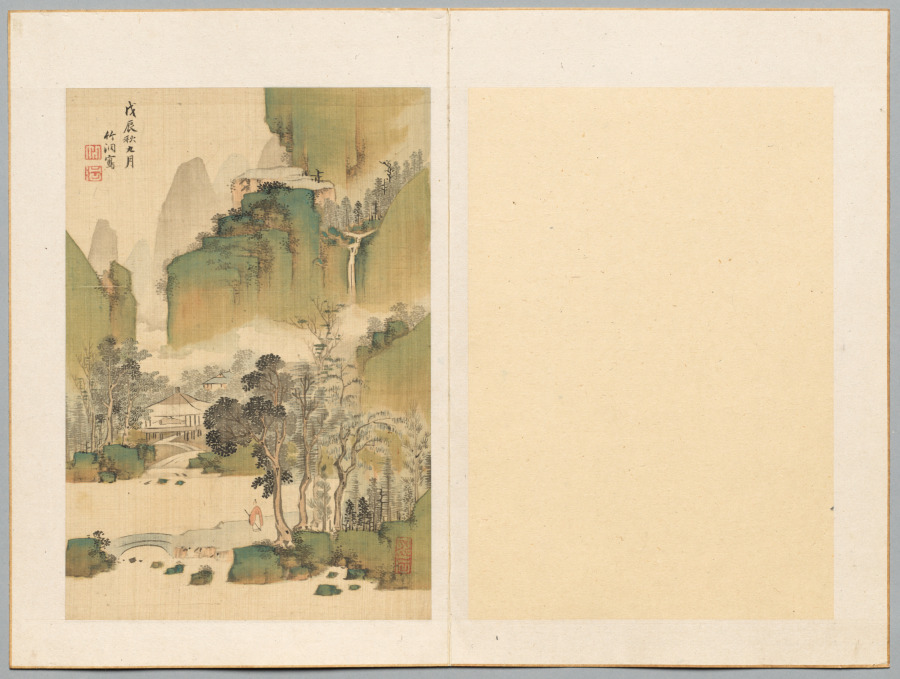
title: Landscape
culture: Japan, Edo period (1615–1868)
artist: Nakabayashi Chikutō (Japanese, 1776–1853)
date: 1808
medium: leaf from a pair of folding albums; ink and light color on paper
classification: Portfolio